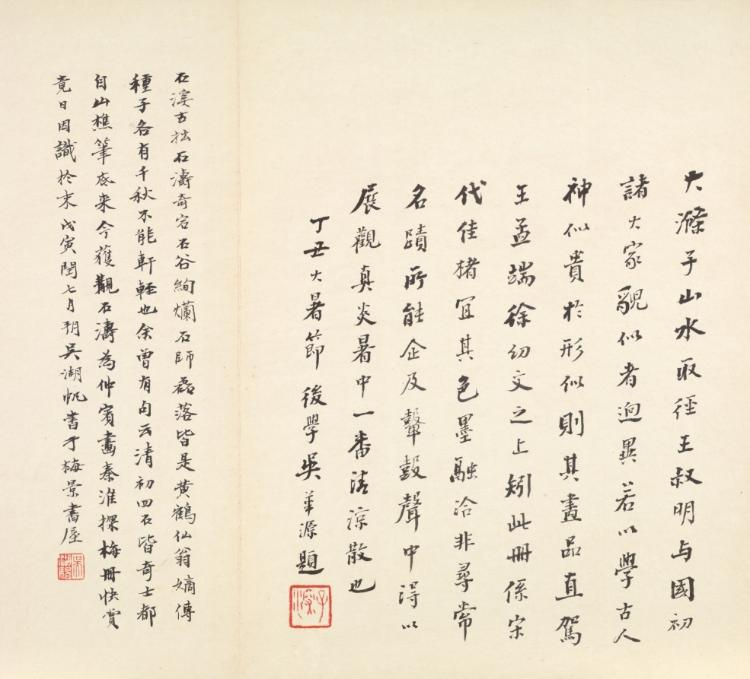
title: Reminiscences of Qinhuai River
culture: China, Qing dynasty (1644-1911)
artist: Shitao (Chinese, 1642–1707)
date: 1642–1707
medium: Album of eight leaves, ink and color on Song paper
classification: Painting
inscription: 大滌尊者濟 [印]原濟; 石濤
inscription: 沿溪四十九迴折，搜盡秦淮六代奇。/ 雪霽東山誰着屐，風高西壑自成詩。/ 應憐孤冷長無伴，其剩槎牙只幾枝。/ 滿地落花春未了，酸心如豆耐人思。/ 仲賓先生以宋紙十幅寄余真州命畫。因憶昔時秦淮探梅聚首之地，寫此就教。清湘石濤濟道人。[印]原濟; 石濤.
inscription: 2 colophons and 15 additional seals: 1 colophon, dated 1937, and 1 seal of Wu Huayuan 吳華源 (1893–1972); 1 colophon, dated 1938, and 2 seals of Wu Hufan 吳湖帆 (1894–1968); 1 seal of C. C. Wang 王季遷 (1907–2003); 11 seals unidentified.